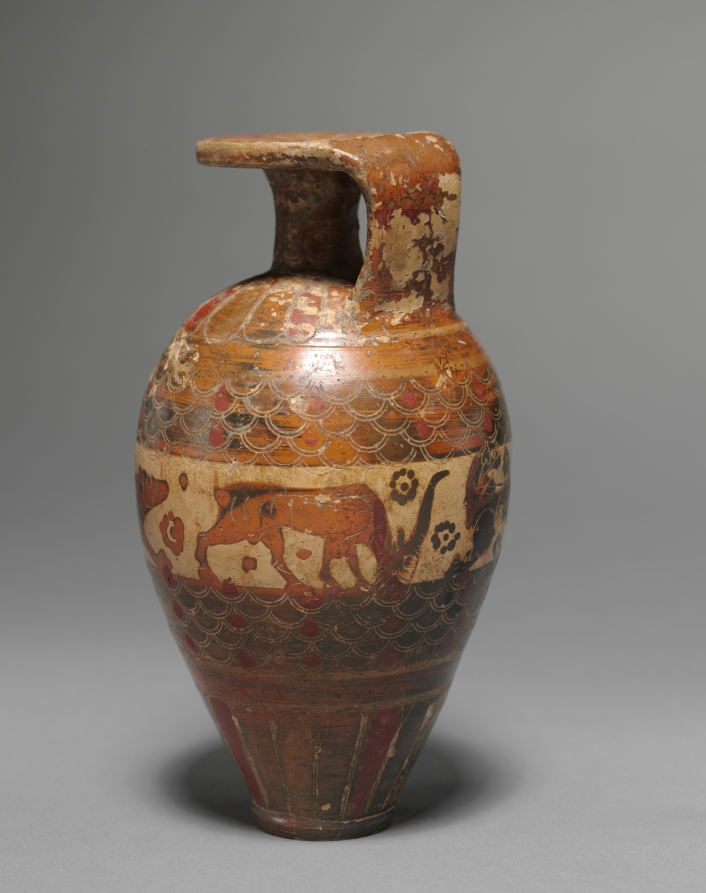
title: Protocorinthian (Early Black-Figure) Aryballos (Oil Flask): Animals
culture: Greek, Corinthian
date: c. 650–640 BCE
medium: ceramic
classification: Ceramic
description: Tongues encircle the rim, shoulder, and base of this small oil vessel, while two carefully incised bands of scales frame an animal frieze. Here, amid dot rosettes, are a bull, dog, and goat, all facing right, and a left-facing lion with head turned back. The black glaze has misfired red in many places, while added red enlivens numerous tongues, scales, and internal details.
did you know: Artists may have used a compass-like tool to create the intricate scale patterns.